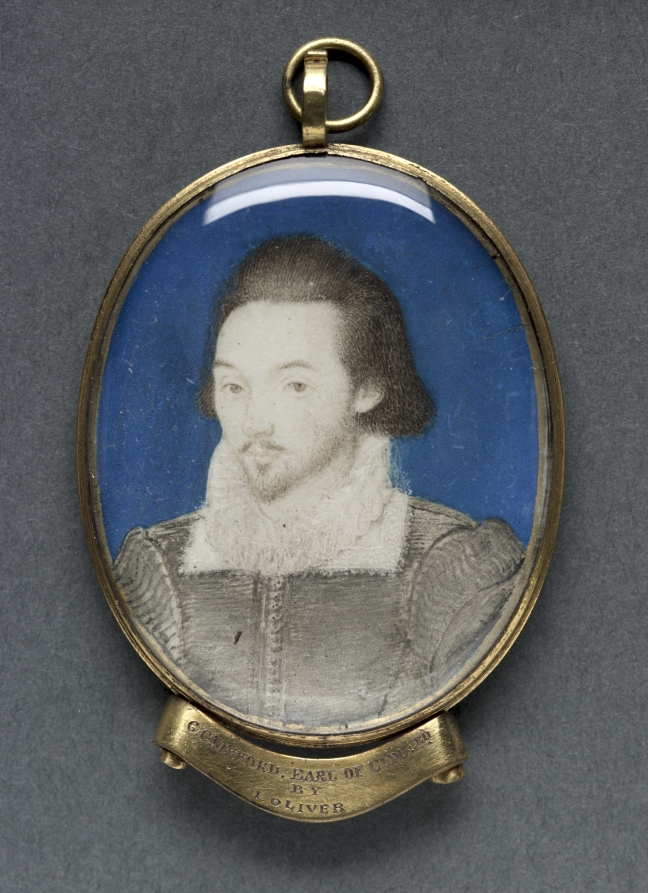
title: Portrait of a Man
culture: England, 17th century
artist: manner of Nicholas Hilliard (English, c. 1547–1619)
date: c. 1600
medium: watercolor on vellum with a gold border in a gilt metal frame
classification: Portrait Miniature